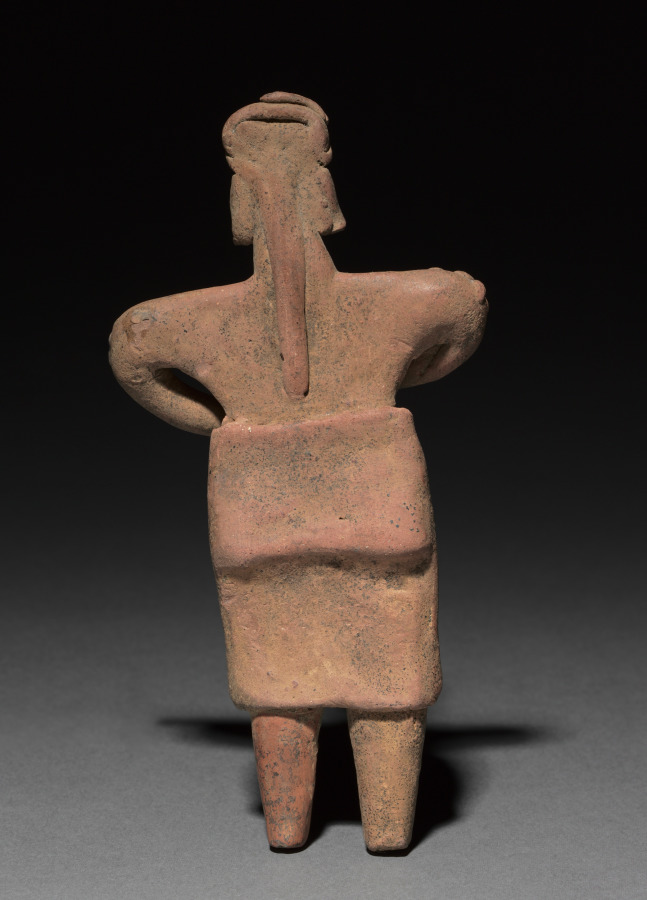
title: Standing figurine holding an animal (dog?)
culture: Mesoamerica, West Mexico, Colima or Jalisco state, possibly Tuxcacueso-Ortices municipality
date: 300 BCE–300 CE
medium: ceramic and pigment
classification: Ceramic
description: Clay figurines were the earliest and most common art form in Mexico and other countries in the ancient Mesoamerican (Middle American) culture region. Made first by hand and later with molds, most figurines belong to the traditions of commoners, such as farmers, rather than those of elites.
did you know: Clay figurines were the earliest and most common art form in the ancient Mesoamerican culture region.